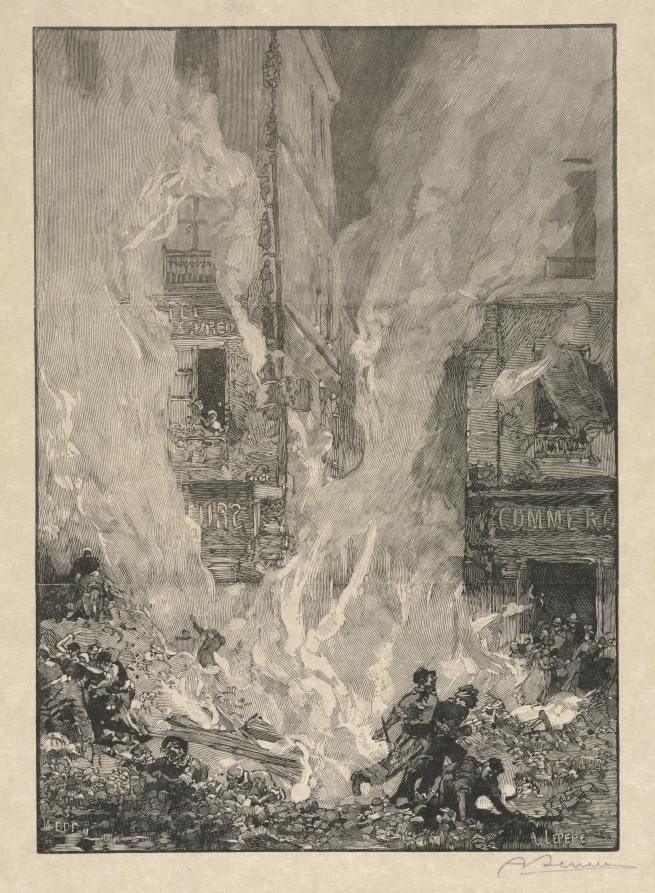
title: City Fire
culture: France, 19th century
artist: Auguste Louis Lepère (French, 1849–1918)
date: c. 1870–1918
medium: wood engraving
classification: Print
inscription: signed lower right, in pencil: "A Lepere"